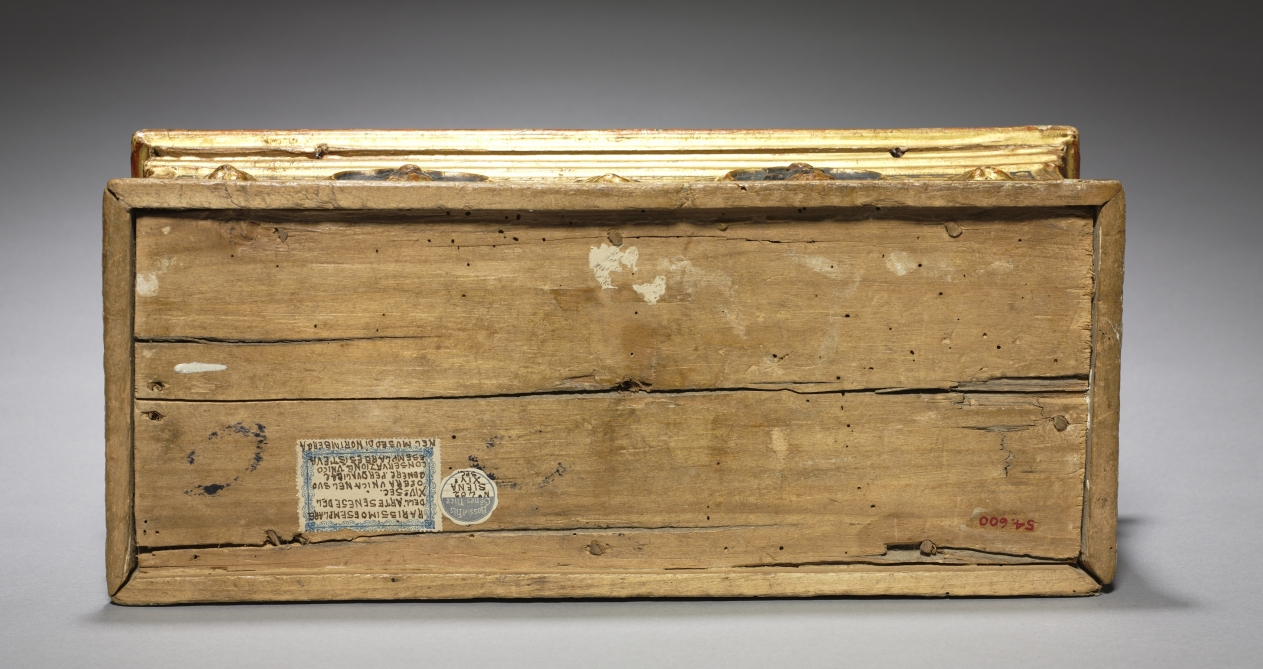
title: Casket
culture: Italy, Siena(?)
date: late 1300s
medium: painted and gilded gesso on wood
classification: Furniture and woodwork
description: This casket is one of only a few of its kind to survive in such a fine state of preservation. A variety of such caskets were used in wealthy homes to store jewelry, seals, mirrors, and combs. A keyhole lock is provided for security. Caskets like this were often highly decorated and given to women as gifts.